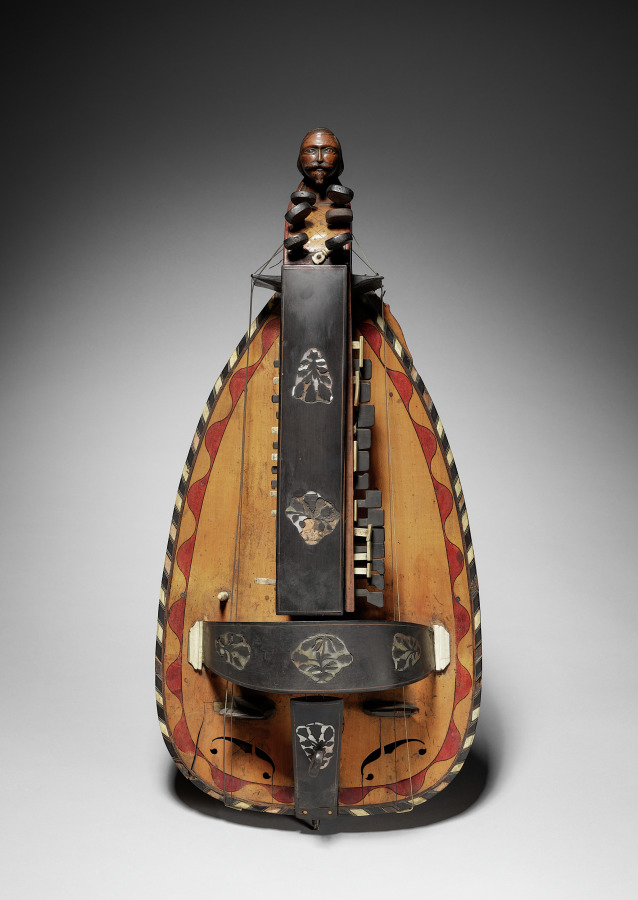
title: Vielle à roue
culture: France, 18th century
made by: Pajot of Jánzat (French)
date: 1700s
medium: wood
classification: Musical Instrument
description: The instrumentalist could play melodies on the keyboard that presses tangents against one or more strings. Often there are also multiple drone strings, which give a constant pitch accompaniment to the melody, resulting in a sound similar to that of bagpipes. This type of instrument is depicted in several artworks in the CMA collection: 1924.656, 2008.34.2, 1960.20. The vielle à roue is also related to the Swedish nyckelharpa, which was featured on the CMA performing arts series in 2017 played by Emilia Amper.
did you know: Also known as a “hurdy-gurdy” or “wheel fiddle,” this instrument produces sound by a hand crank-turned rosined wheel rubbing against the strings.